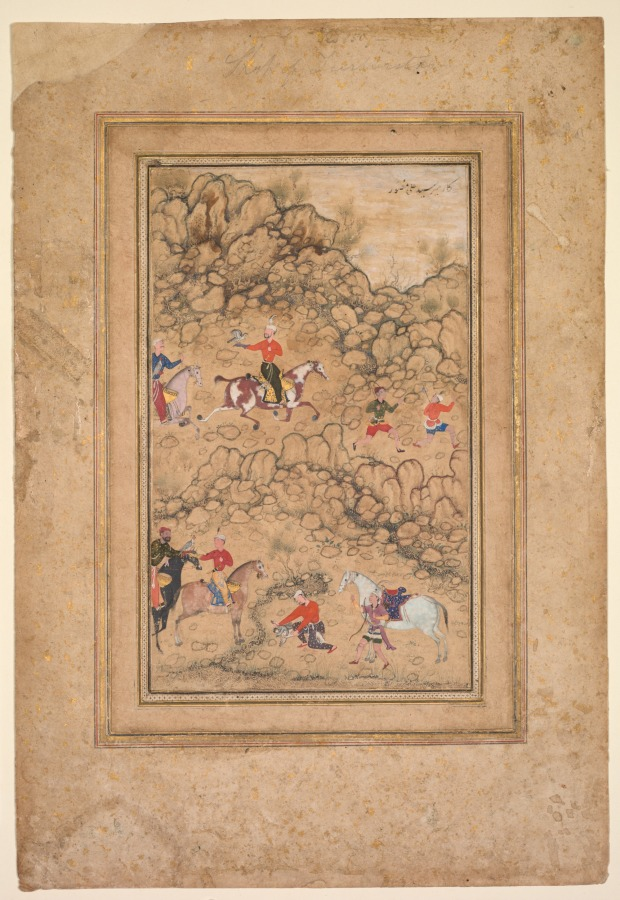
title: Hunting with falcons in a landscape (recto)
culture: Mughal India, court of Akbar (reigned 1556–1605)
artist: attributed to Abd al-Samad (Persian, c. 1510–1600)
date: c. 1558–60; borders added probably 1700s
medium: Gum tempera, ink, and gold on paper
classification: Painting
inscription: Inscription in upper right in nasta‘liq script, probably during the 1700s: the work of Mir Sayyid Ali, the illustrator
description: Mughal princes hunted on horseback with falcons. The hunting party would ride out into the wild and flush the prey from the brush. Then, its hood removed, the falcon would chase the prey and bring it down. This important work is thought to have been painted by one of the Persian artists Akbar’s father brought to India from Iran shortly after his arrival in India. The delicacy of the diminutive figures and the gently modeled rocks of the arid landscape contrast to the boldly dynamic paintings made by Indian artists.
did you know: The hunter’s glove is on the ground, as he pulls his falcon off the duck.